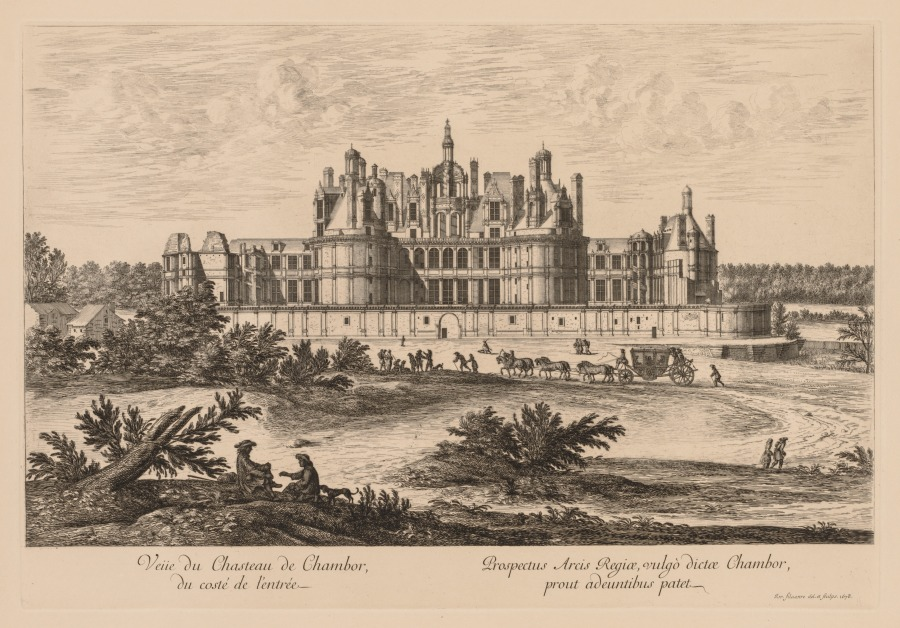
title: Vue du Château de Chambord, du côté de l'entrée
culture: France, 17th century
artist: Israël Silvestre (French, 1621–1691)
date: 1678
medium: engraving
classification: Print